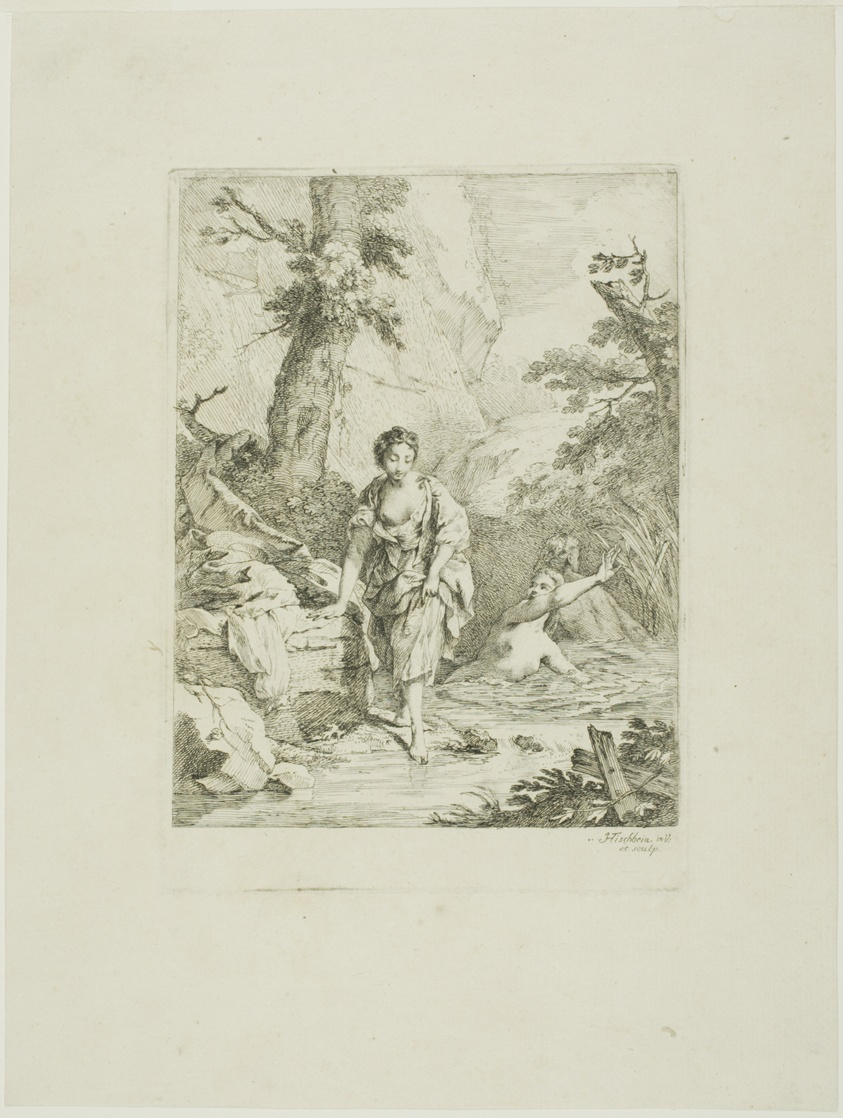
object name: Print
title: Three Female Bathers, Two in the Water, the Third Getting in by Herself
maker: Johann Heinrich Tischbein, I (German, 1722-1789)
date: 1742/89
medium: Etching on ivory laid paper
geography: Germany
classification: etching; print; prints and drawing